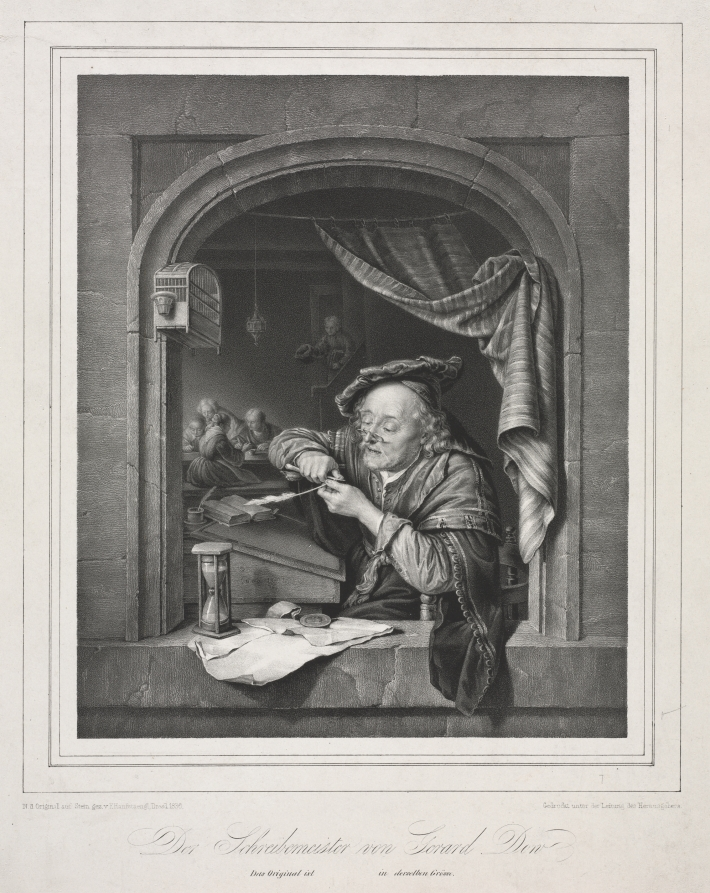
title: The Writing-Master of the Old Schoolmaster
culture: Germany, 19th century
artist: Franz Seraph Hanfstaengl (German, 1804–1877)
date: 1836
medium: lithograph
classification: Print